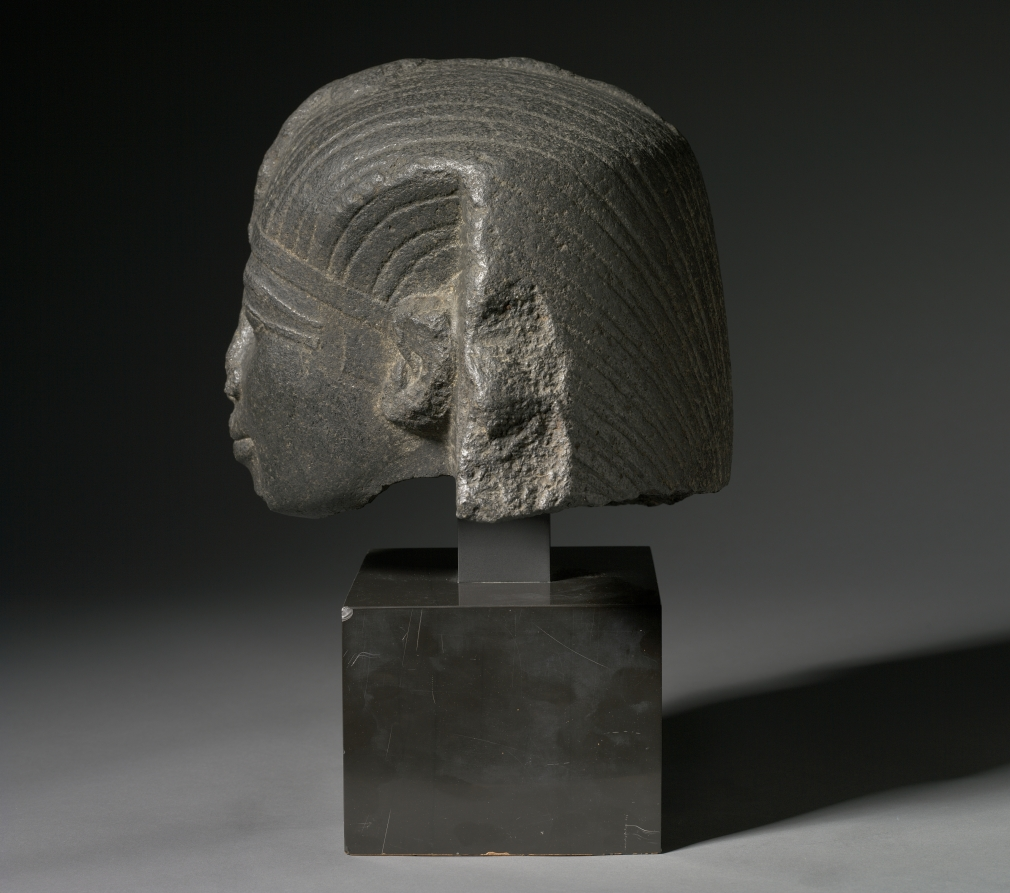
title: Head of a King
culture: Egypt, Third Intermediate (1069–715 BCE), Dynasties 21–22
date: c. 1069–715 BCE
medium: granodiorite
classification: Sculpture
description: This head was the first Egyptian royal sculpture to enter the museum. Although regal in appearance, the rather generalized facial features are not indicative of any specific ruler. It appears to be a work of the Third Intermediate Period, when artists drew inspiration from the elegant, idealizing style of the 18th Dynasty.